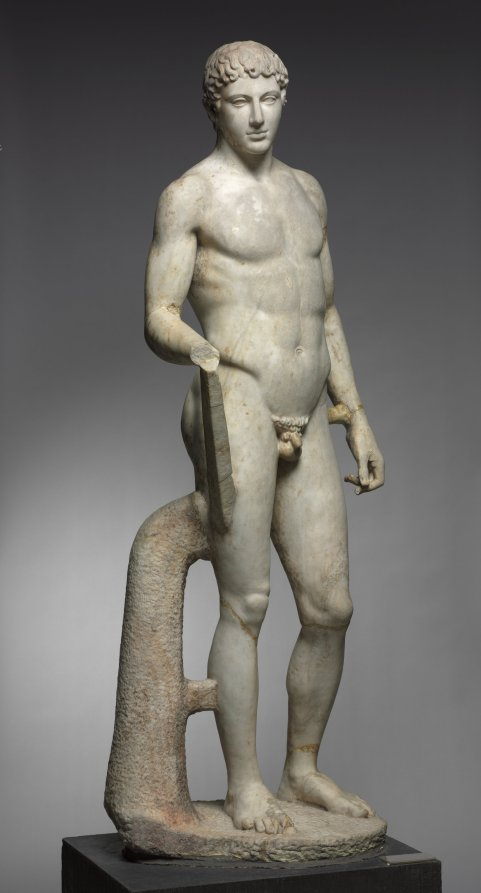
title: Statue of an Athlete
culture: Italy, Roman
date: 1–100 CE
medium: marble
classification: Sculpture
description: This idealized athlete recalls Greek sculptural types invented and popularized during the 400s BC. Large-scale athletes and other sculptures like this were originally created by famous artists as sanctuary dedications. Centuries later, they were widely copied and adapted by Roman sculptors, whose clients sought their own versions of earlier masterpieces. Working in marble rather than bronze, these sculptors added certain elements for stability, such as the struts and the large tree trunk beside the right leg here. Sculptures like this one are profoundly complex, made by and for Romans but descended from Greek ancestors.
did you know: For many years, this sculpture stood in the rotunda of the Cleveland Museum of Art.